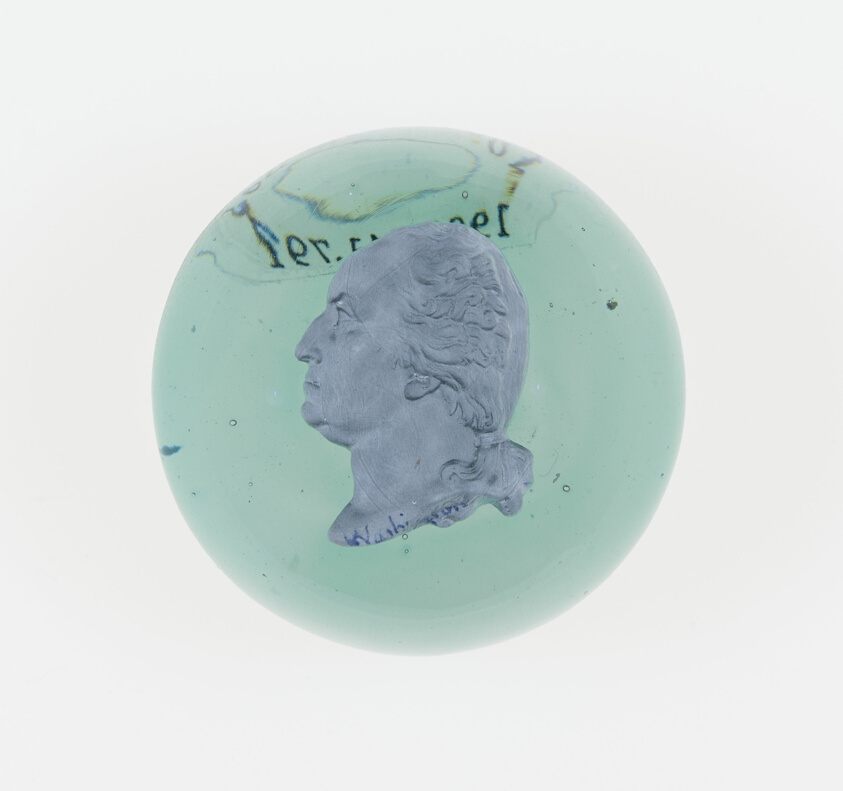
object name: Glass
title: Paperweight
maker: Baccarat Glassworks (Cristalleries de Baccarat); Lorraine, France, founded 1764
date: Mid 19th century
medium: Glass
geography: Baccarat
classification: paperweight; glass